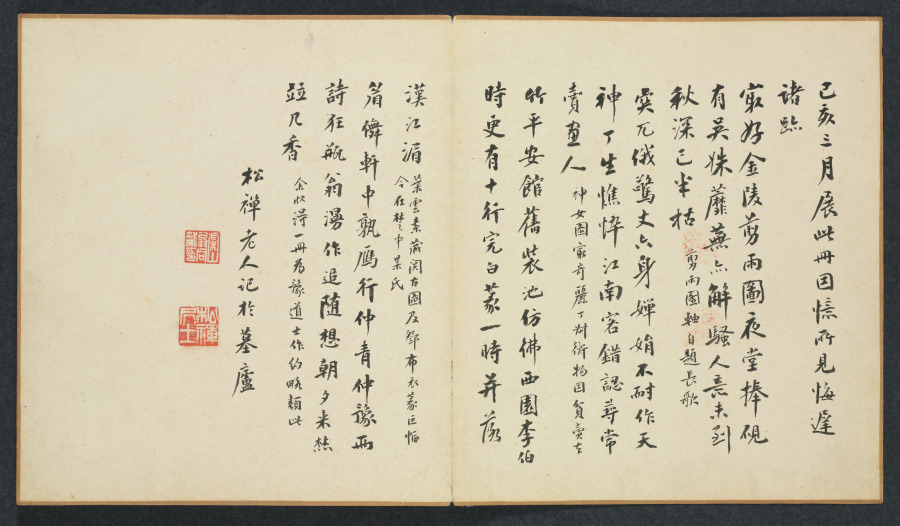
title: Paintings after Ancient Masters: Calligraphy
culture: China, Ming dynasty (1368–1644)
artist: Chen Hongshou (Chinese, 1598/99–1652)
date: 1598–1652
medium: album leaf, ink and color on silk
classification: Painting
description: The twenty paintings in this double album by Chen Hongshou include landscapes, figures, and flowers. It also has one leaf featuring a woman, an often-used subject not found in the other albums from the latter part of his career. His late works are wonderful summations of Chen's peculiar and quirky art—archaistic, hyper-refined—but without accompanying shallowness or sentimentality. His figures and landscapes in the late albums are miniaturized, not unlike the small Chinese gardens, or the carefully selected small table rocks or old roots used for contemplation to see the world in miniature. This loss of scale is quite deliberate and reflects the psychological situation of a depressed class like the Ming loyalist officials and scholars, deprived of their integrity and honor, and forced to lead a diminished and restricted existence.